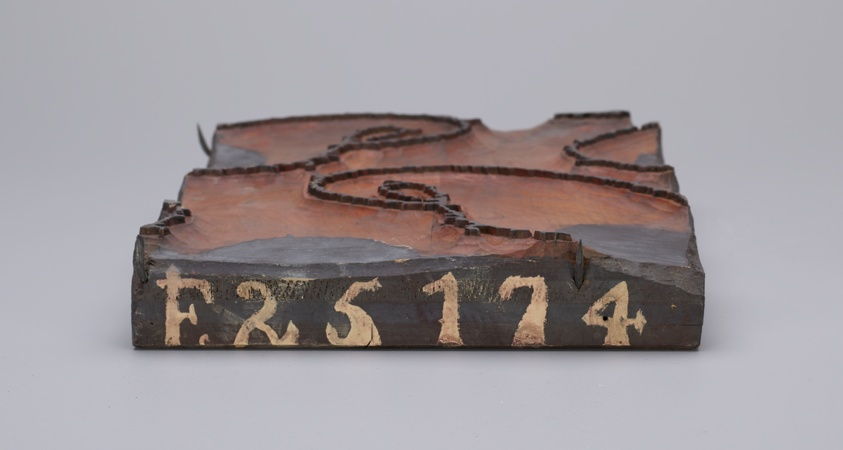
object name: Textile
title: Six Printing Blocks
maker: England or France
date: before 1850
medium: Carved wood, treated in a variety of techniques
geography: England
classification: printing blocks (printing surfaces); textile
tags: paisley